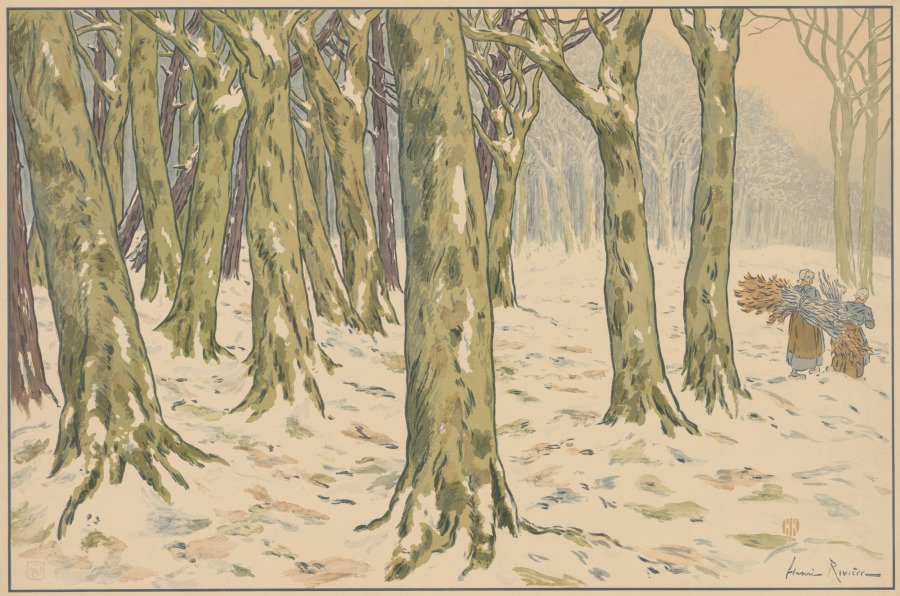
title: The Woods, Winter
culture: France, 19th century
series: Aspects of Nature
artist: Henri Rivière (French, 1864–1951)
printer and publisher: Eugene Verneau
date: 1898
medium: color lithograph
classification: Print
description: Prints were typically collected and kept in portfolios, but around 1891 some artists began to produce large color lithographs to be framed and hung indoors. Beginning in 1896, Henri Rivière designed 12 compositions titled Aspects of Nature, meant to be hung in vestibules, dining rooms, children’s bedrooms, or in schools to enliven classrooms and cultivate the students’ love for nature.